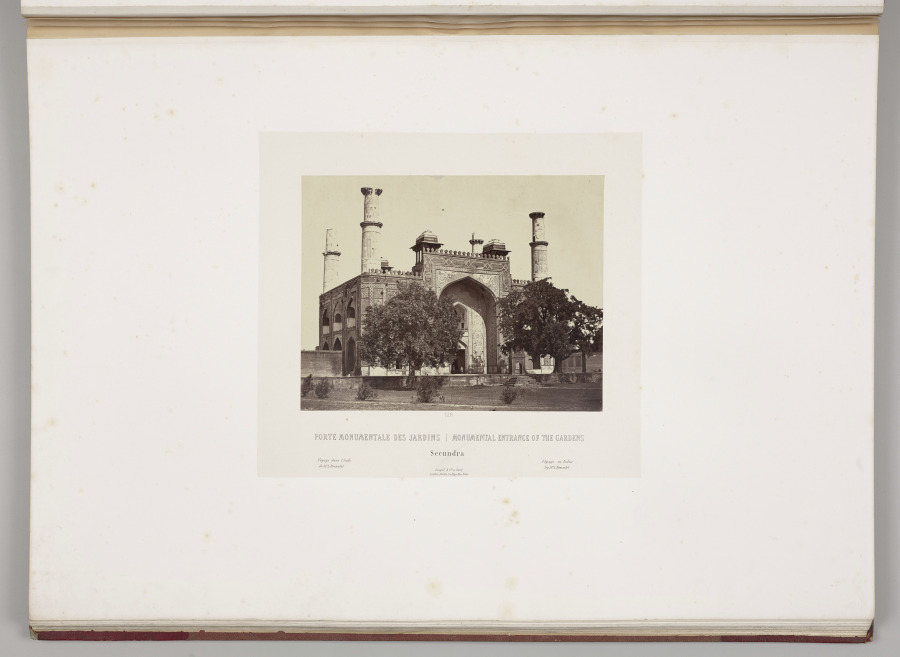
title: Monumental Entrance of the Gardens, Secundra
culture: France, 19th century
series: India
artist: Louis-Théophile Marie Rousselet (French, 1845–1929)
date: 1865–68, published 1869–70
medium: Albumen print from glass plate negative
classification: Photograph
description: Concerned that his drawings did not do justice to the splendor of India’s monuments, Rousselet learned photography in India that year, a remarkable accomplishment. He proved to be a talented photographer with a sophisticated sense of composition. The scenes in this volume sweep across sites of Sultanate, Rajput, and Mughal power in northern India, from the sacred Hindu city of Varanasi on the Ganges River to Alwar in Rajasthan. Also included are several scenes of industry and portraits of Indian rulers.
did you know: Louis Rousselet described himself as a “scientific traveler” when he went to India alone at age 18 in 1863 and stayed into 1868.